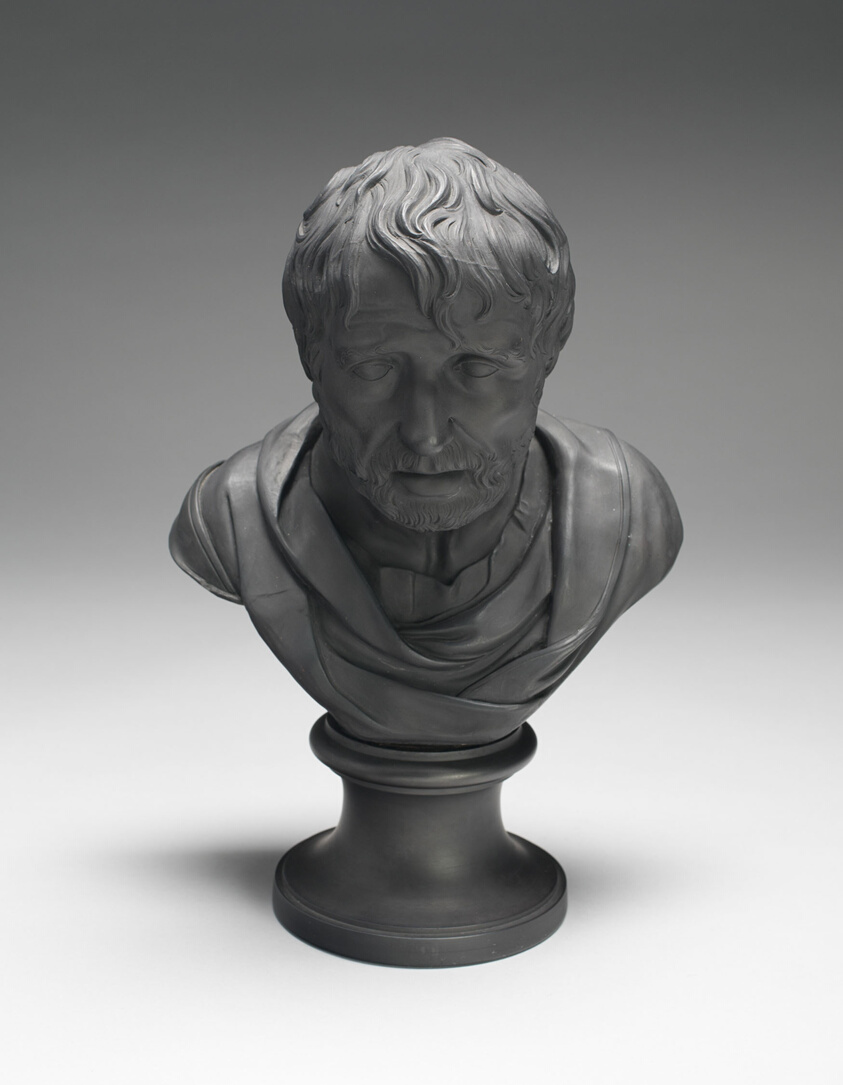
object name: Ceramics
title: Seneca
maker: Wedgwood Manufactory; England, founded 1759; Etruria, Staffordshire, England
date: c. 1775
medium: Stoneware (basaltware)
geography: Burslem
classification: sculpture; stoneware; european decorative arts; ceramics